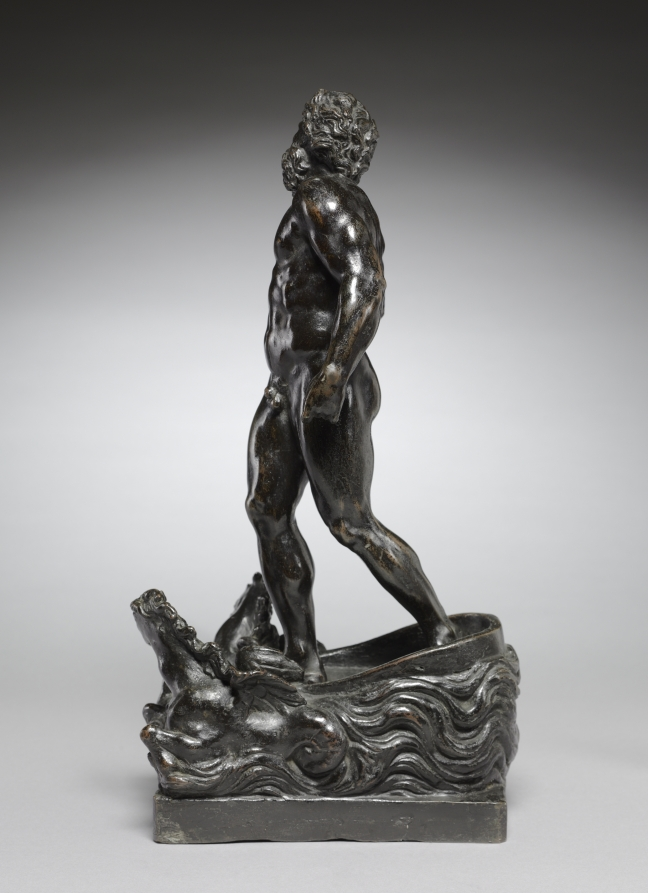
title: The Wrath of Neptune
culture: Italy, 16th century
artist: cast after a model by Tiziano Minio (Italian, 1511/12–1552)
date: late 1500s to early 1600s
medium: bronze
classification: Sculpture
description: In Roman mythology, Neptune (or Poseidon in Greek mythology) is the god of flowing water and is believed to protect against droughts. This small bronze is likely a sculptural representation of the Wrath of Neptune from the Aeneid. During the Trojan War, Juno incited winds to sink Trojan ships. Infuriated by Juno's incursion into his domain of the sea, Neptune rides out in his chariot, saving the Trojan army and threatening to punish the winds for their insolence. The massive, muscular nude male figure stands upright on his seahorse-drawn chariot, twisting to face the wind. The turbulent waves and the windblown hair and beard of the figure give life to this small bronze. The figure's left hand would have originally held reins, while the right hand, which once held a trident, is outstretched in the act of commanding the waves to be still. This bronze was once attributed by art historian Wilhelm von Bode to Jacopo Sansovino based on its similarity to known works, such as the over-life-size marble figure of Neptune of the Scala di Giganti outside of the Doge's Palace in Venice. However, by 1921 Leo Planiscig had noted the CMA Neptune's similarity to bronzes and reliefs by Sansovino's pupil, Tiziano Minio, in the Loggetta at San Marco Square, Venice. In Minio's Jupiter on the Island of Candia for the Loggetta, the waves are represented with the same incised, undulating grooves as in this work. Neptune possesses the same stocky proportions and heavy musculature which was characteristic of Minio. The high polish and sweeping contours of the figure are characteristic of Sansovino, but the heightened drama of the subject display Minio's stylistic advancement from his teacher.